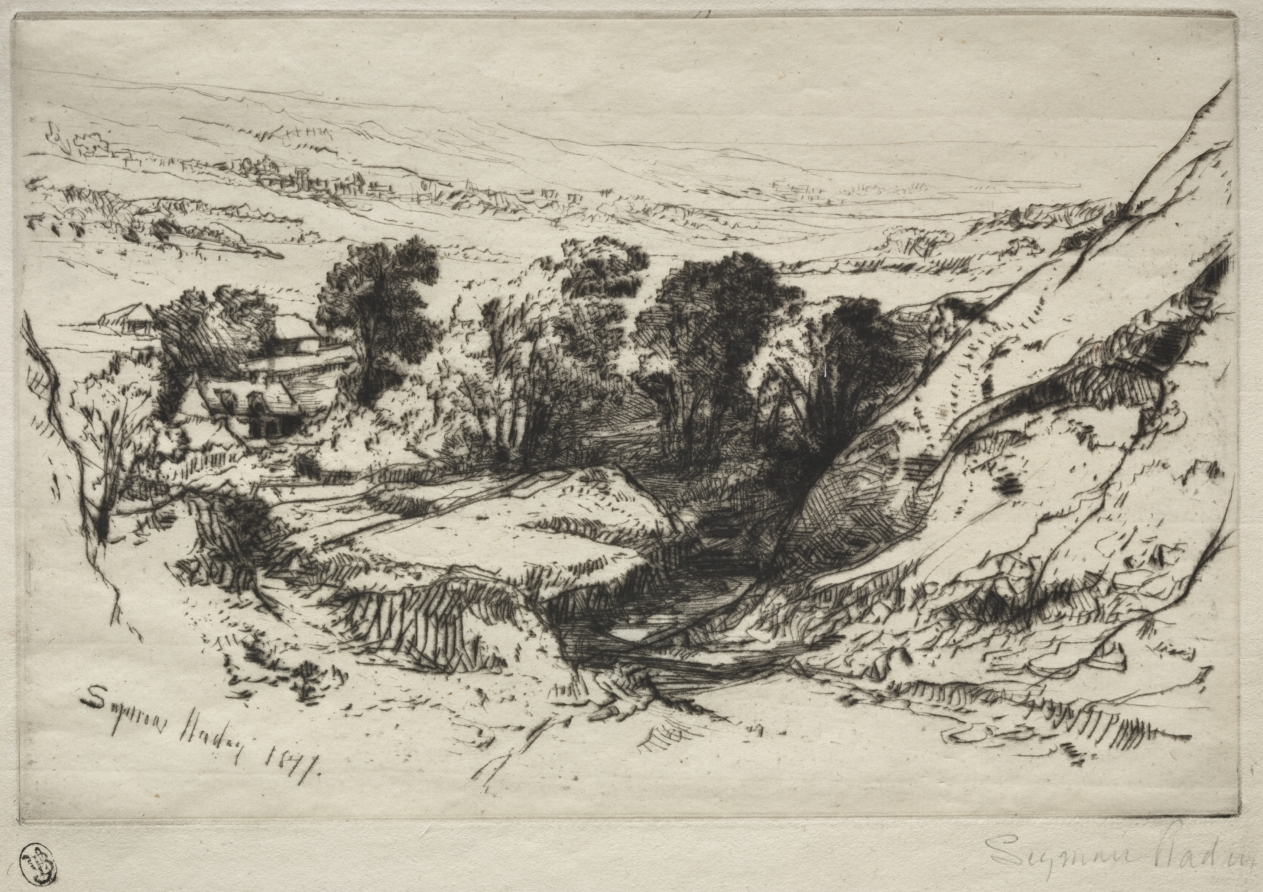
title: Nine Barrow Down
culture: England, 19th century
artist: Francis Seymour Haden (British, 1818–1910)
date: 1877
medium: drypoint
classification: Print